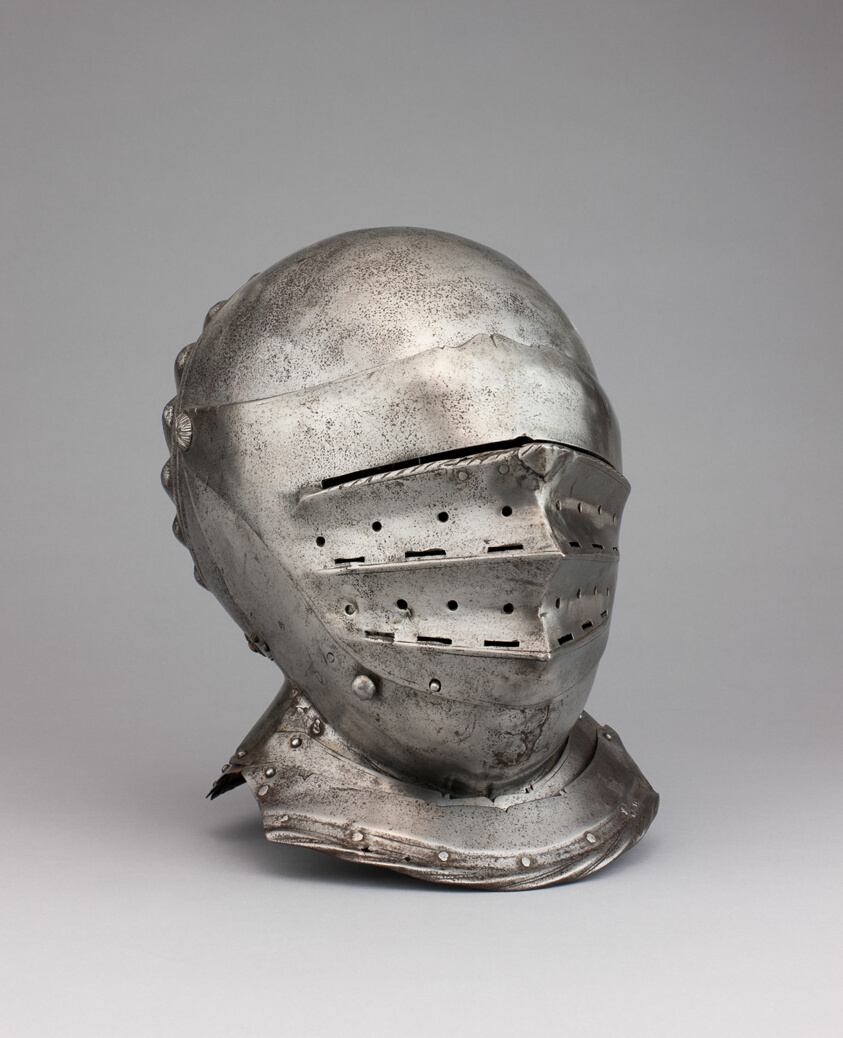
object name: Armor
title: Close Helmet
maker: Italian in the German style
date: c. 1510/20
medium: Steel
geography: Italy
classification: suit-helmet; armor; arms and armor